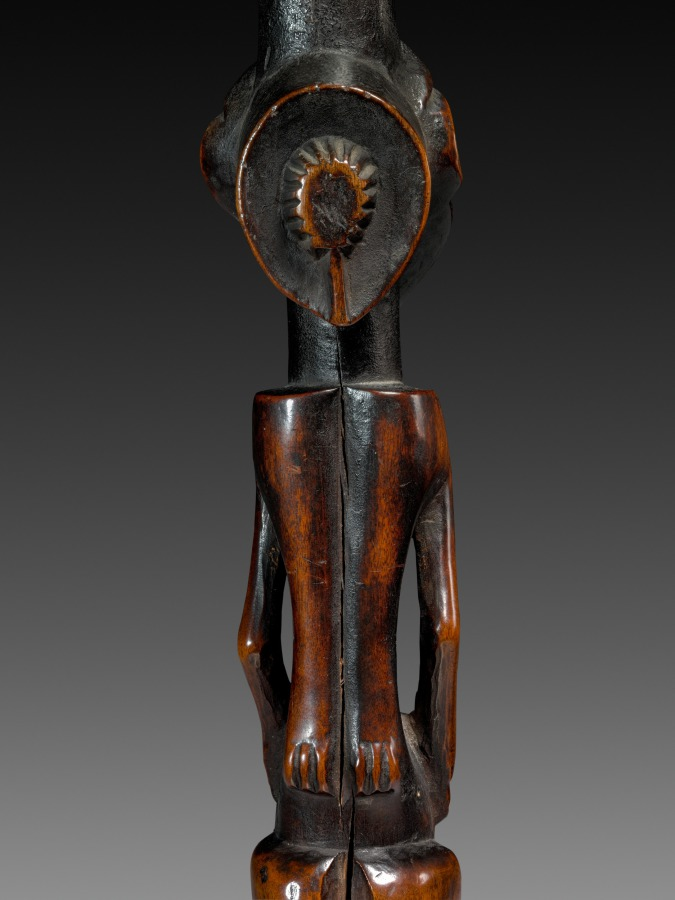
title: Bow Stand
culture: Africa, Central Africa, Democratic Republic of Congo, Luba-style carver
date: 1800s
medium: Wood and plant fiber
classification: Sculpture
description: A powerful symbol of the Luba king, bow stands were ceremonial objects that resided within the king’s private vicinity in the palace and were never displayed in public. Typically, bow stands depict a female figure, but the sculptor has carved a figure with ambiguously gendered human traits. This is a symbolic depiction that may allude to how divine rulers (mulopwe) were believed to have both “male” and “female” character traits, which allowed this sculpture to act as a vessel for spirits of any gender.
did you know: The shape of this wooden bow stand is based on a more practical version in metal used by hunters.